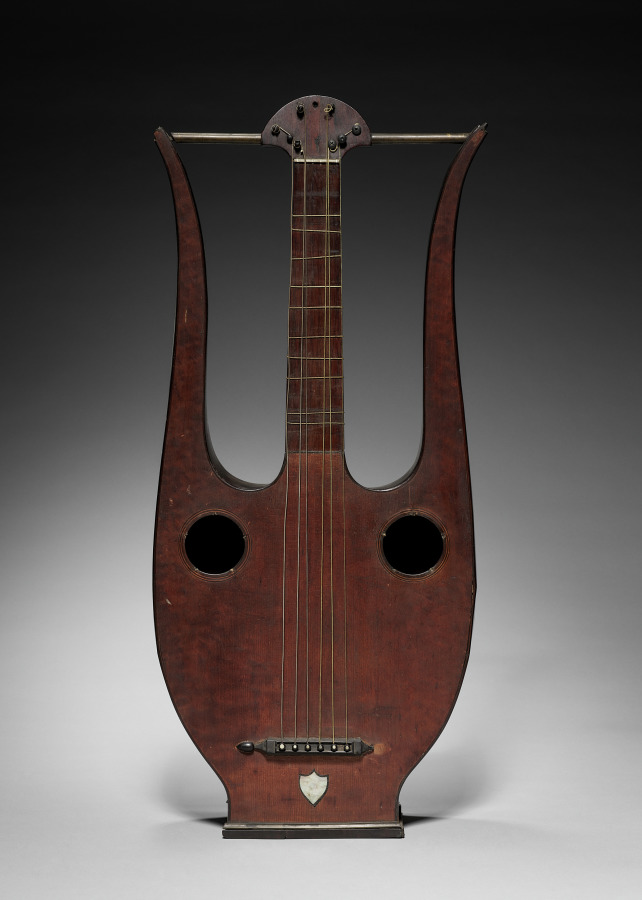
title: Lyre Guitar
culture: Italy, late 17th century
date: late 1600s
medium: wood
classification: Musical Instrument